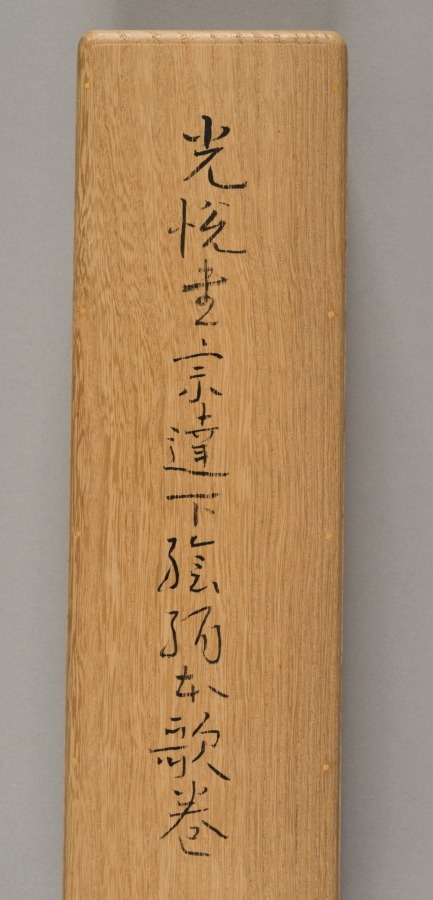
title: Two Beauties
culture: Japan, Edo period (1615–1868)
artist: Kitao Shigemasa (Japanese, 1739–1819)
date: late 1700s–early 1800s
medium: hanging scroll, pillar painting: ink and color on silk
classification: Painting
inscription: Artist's signature and seal, lower right corner. Poem inscribed on upper section of scroll.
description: Shigemasa favored using colors in broad opaque masses, as seen here in the beauties’ robes. He was a painter, printmaker, and poet, specializing in courtesan and actor prints. The format of this hanging scroll or "pillar painting" allows for the work to be hung on a pillar in a Japanese home.